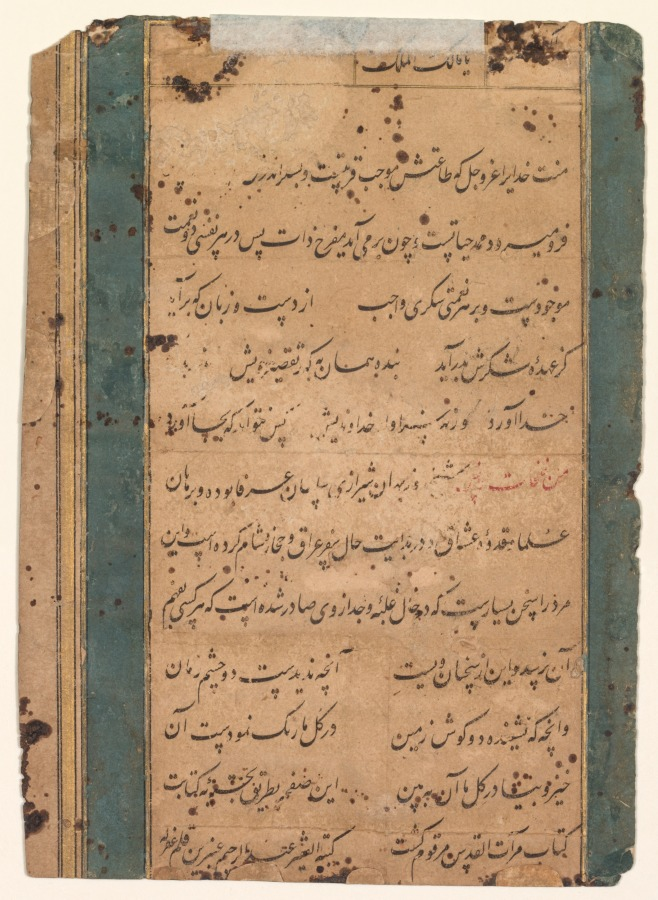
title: A Courtier, Possibly Khan Alam, Holding a Spinel and a Deccan Sword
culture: Mughal India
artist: attributed to Govardhan (Indian, active c.1596–1645)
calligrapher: Abd al-Rahim, the Anbarin-Qalam (Indian, active c. 1590–1630)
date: c. 1605–10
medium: gum tempera, ink, and gold on paper, text on verso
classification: Painting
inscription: Verso: A tahshiyya (marginal addendum) in rhymed prose from the Gulistan (Rose Garden) of Sa‘di (Persian, 1210–1291) and the Nafahat al-Uns (Breaths of Fellowship) of Abd al-Rahman Jami (Persian, 1414–1492), c. 1605, Abd al-Rahim, the Anbarin-Qalam (Indian, active c. 1590–1630), Mughal court; In nast’aliq script: O Lord of the all dominions Praise and thanks to God—may he be honored and glorified!—whose worship brings one closer to him and giving thanks [to him] increases his bounty. [Each breath] that one inhales, prolongs life, and when exhaled a rejuvenation of the soul. Thus each breath contains two blessings, and on each blessing gratitude is due. Who is able, by word or deed, to fulfill the task of paying him due thanks? It is more apt for his slaves to seek at the Divine court pardon for their shortcomings, for what truly is worth his lordship none can render adequately. Persian verses from the Nafahat al-uns quoting a poem by the mystic Sheikh Ruzbihan of Shiraz (Persian, 1128–1209), in nast’aliq script: That which has not been visible to the eye of time; That which has not been audible to the ears of the earth; Has manifested itself in the clay of my being. Come at once and see it in my clay.This page has been written as marginalia to the book Mir’at al-quds [Mirror of Holiness],written by the wretched Abd al-Rahim Anbarin-Qalam, may God forgive his sins.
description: According to Akbar's court historian, the emperor ordered likenesses to be taken of the grandees of his realm. "An immense album was thus formed: those that have passed away have received a new life, and those who are still alive have immortality promised them." Akbar's son and successor, Jahangir (reigned 1605-27), continued the tradition of commissioning works of lifelike portraiture for inclusion in imperial albums. This courtier wears an opulent fur-trimmed, fringed velvet coat over his belted white tunic and striped pants-the typical Mughal dress derived from their roots among the nomadic horse-riding people of Central Asia. The artist has reveled in creating the soft textures of the facial hair, fur and fabrics. He holds a ruby-like gemstone called a spinel, which was prized among the Mughals for its talismanic properties of protection during battle.